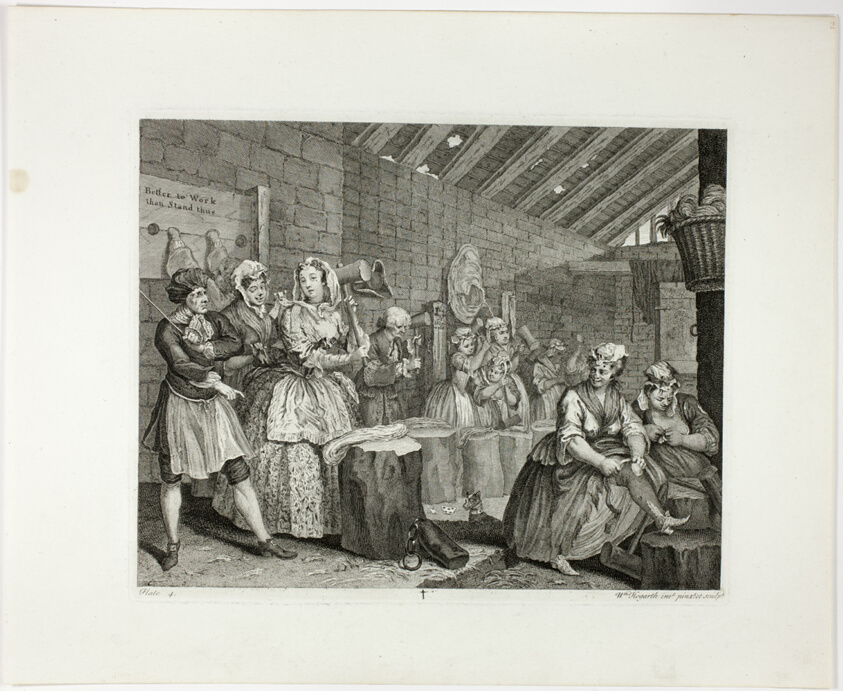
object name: Print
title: Plate four, from A Harlot's Progress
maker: William Hogarth (English, 1697-1764)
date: 1732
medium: Engraving in black on ivory laid paper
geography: England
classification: engraving; paper; print; prints and drawing